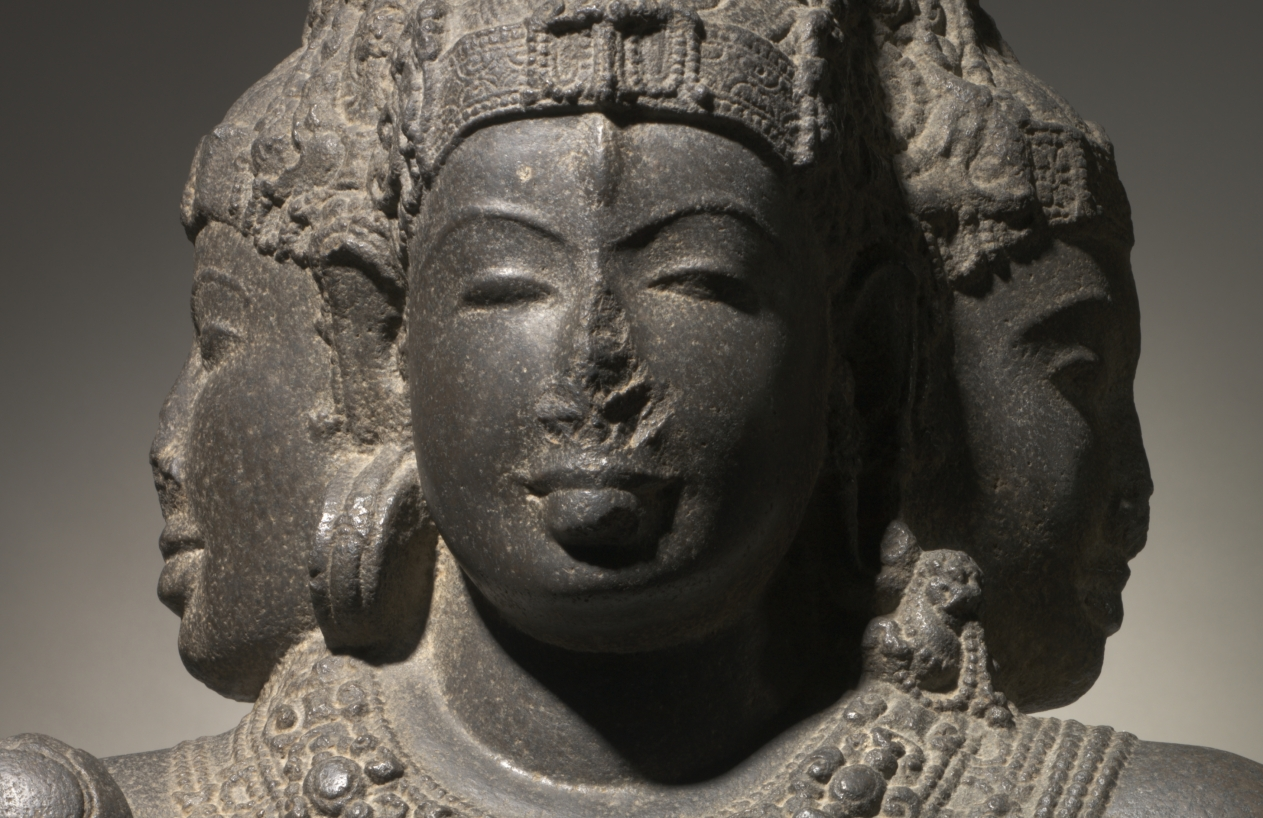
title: Brahma-Shiva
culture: South India, Tamil Nadu, Chola dynasty, late 10th - early 11th century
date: late 900s–1000s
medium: granite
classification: Sculpture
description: In the Hindu pantheon Brahma is in charge of carrying out the work of creation. In this tour-de-force of South Indian temple sculpture, he is in a special regal aspect, with the only elements of his typical priestly appearance being the prayer beads and the matted dreadlocks piled on his head. Four arms connote superhuman power, and four heads convey the idea that his creative activities spread in all four directions. His upper right hand enjoins freedom from fear, and the lower holds a lotus bud associated with birth and the process of creation. His lowered left hand is held in the gift-giving gesture, suggestive of the gift of creation he will bestow upon the world.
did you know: The back of the sculpture retains the original textured surface from a pointed chisel, suggesting it was in a niche or near a wall, protected from worshippers’ touches.